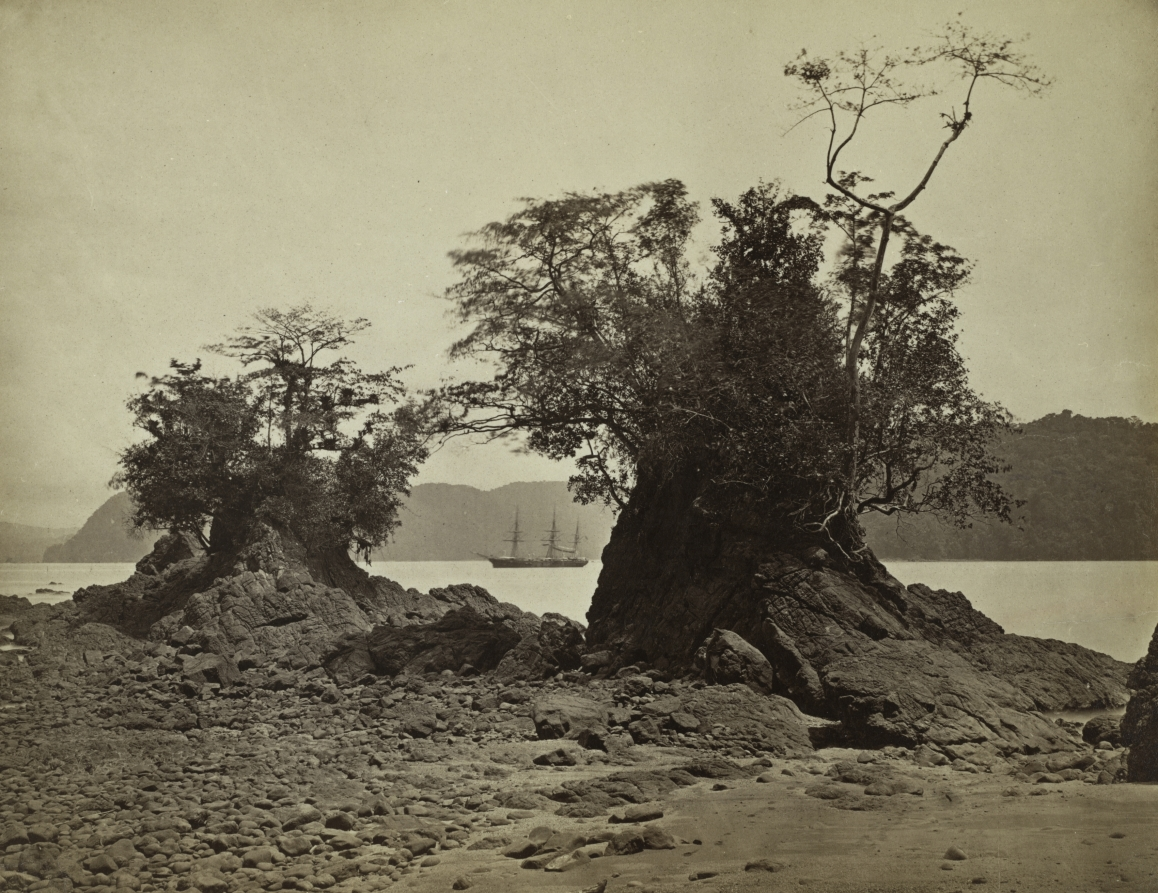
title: Islands in Limón Bay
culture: America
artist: John Moran (American, 1829–1902)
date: 1871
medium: albumen print from wet collodion negative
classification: Photograph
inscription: Written in brown ink on verso: "Islands in Limon Bay / with Res[unclear]"